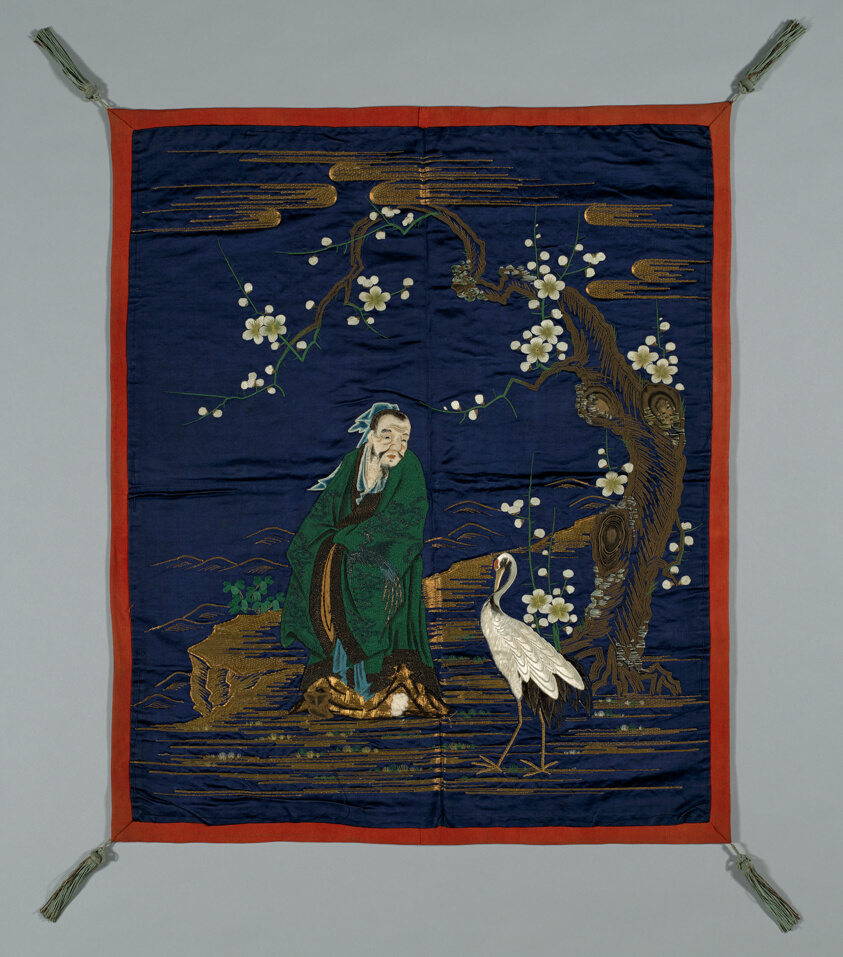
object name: Textile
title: Fukusa (Gift Cover)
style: Japanism, meiji, late edo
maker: Japan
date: late Edo period (1789–1868)/ Meiji period (1868–1912), 1870/95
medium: Embroidered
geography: Japan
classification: textile; costume